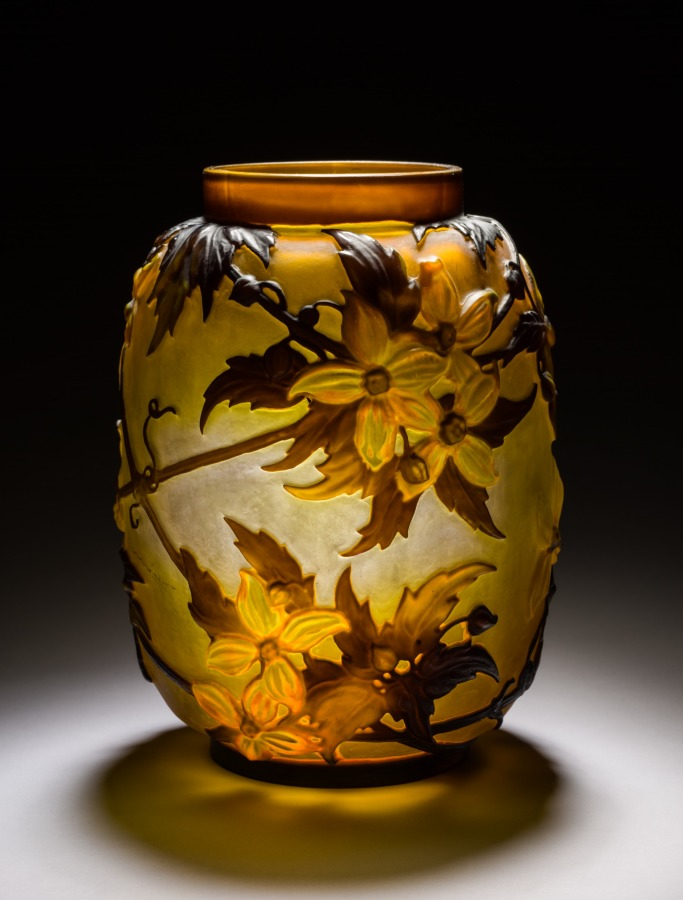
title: Vase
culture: France, 19th century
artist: Emile Gallé (French, 1846–1904)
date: c. 1920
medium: glass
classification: Glass